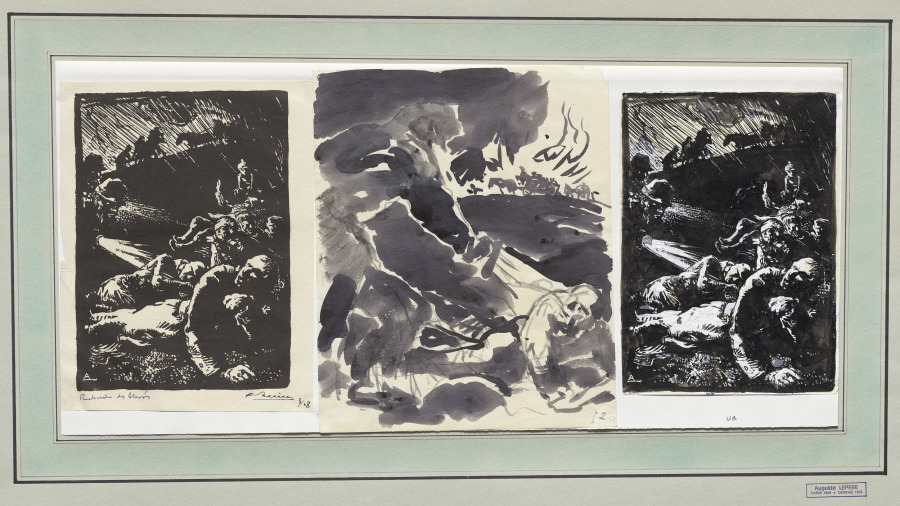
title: Recherche des blessés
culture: France, 20th century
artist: Auguste Louis Lepère (French, 1849–1918)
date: 1914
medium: brush and black ink heightened with white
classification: Drawing